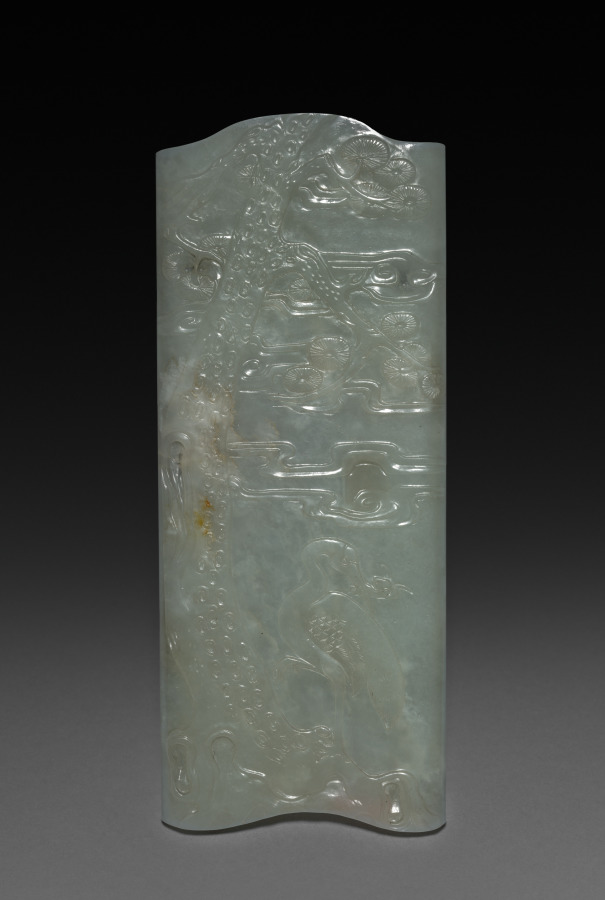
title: Wrist Rest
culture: China, Qing dynasty (1644–1911), Qianlong reign (1736–95)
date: 1736–95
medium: jade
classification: Jade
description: In China, access to political power was granted to those who passed the civil service examinations, a system that offered official service only at a high level of education. Chinese literati-officials, whose daily routine involved administrative work in an office, enjoyed precious objects on their writing desks that offered distraction and demonstrated good taste. By the Ming (1368–1644) and Qing (1644–1911) dynasties, these utensils of the literati studio also became collectibles and were treasured as artworks. The front of this jade wrist rest is carved with a design of a pine tree, clouds, and a crane of immortality holding a branch of lingzhi fungus in its mouth. The raised rectangular boss on the back of the wrist rest is inscribed.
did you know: Wrist rests were used to steady the hand while creating graceful brush strokes.